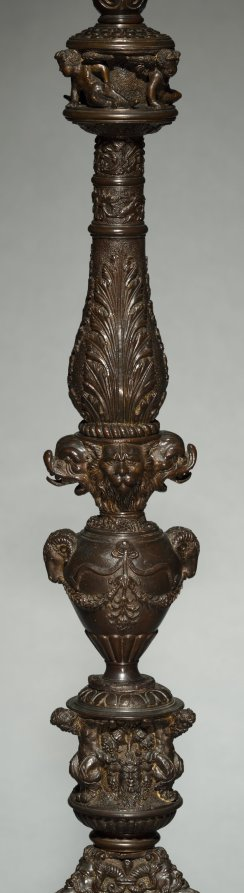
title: Paschal Candlestick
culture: Northern Italy, possibly Padua, 16th century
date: c. 1525–1550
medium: bronze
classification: Sculpture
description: In Roman Catholic practice, a large candlestick holds the Paschal Candle, blessed and lit for the first time on Easter eve, then used on significant occasions throughout the year. Despite its religious function, the decorations here are entirely secular-ranging from panthers and bound satyrs to the heads of raptors and goats. These elements derive from ancient Roman sculpture and were especially popular among intellectuals in northern Italy, who were actively exploring connections among pagan traditions, ancient philosophy, and Christianity.